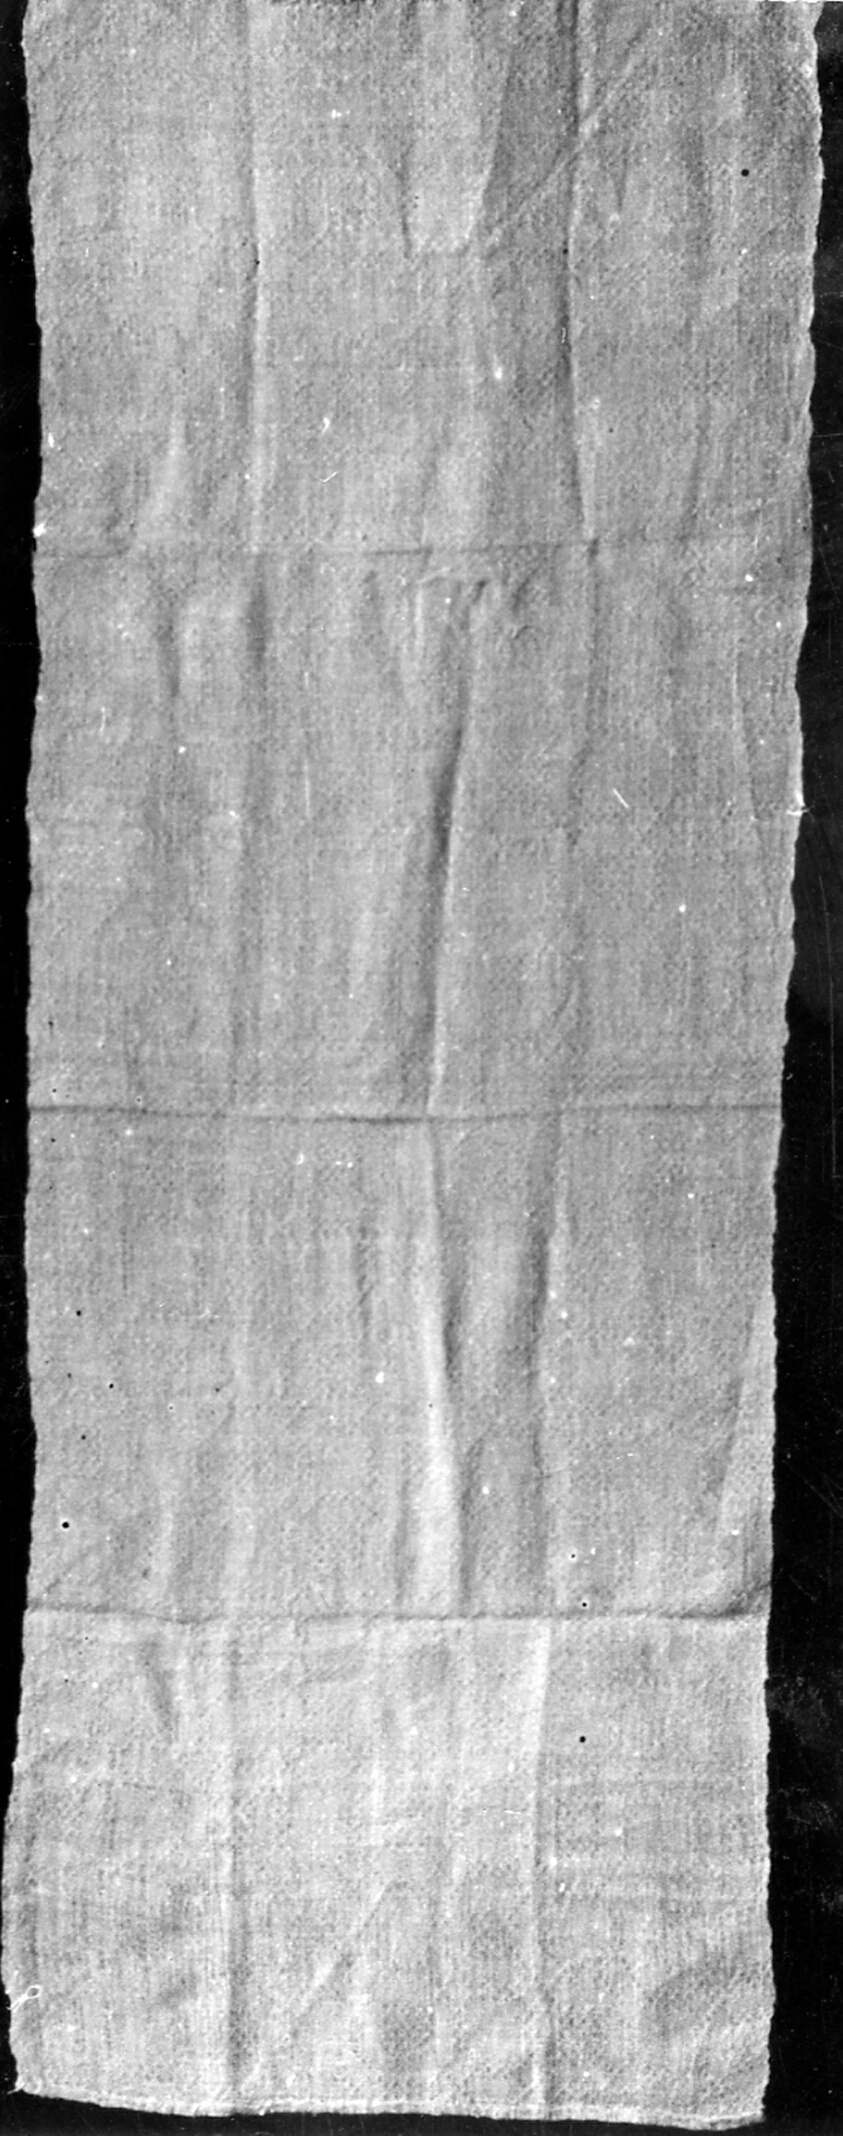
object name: Textile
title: Panel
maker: United States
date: 19th century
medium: Linen, plain weave; self-patterned by main warps and ground weft floats; open work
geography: United States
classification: textile; weaving